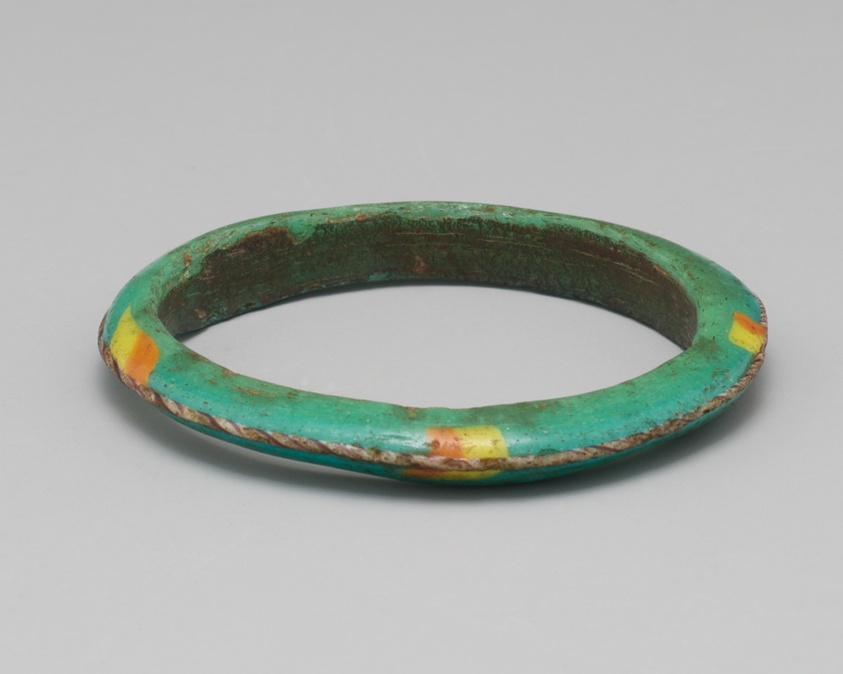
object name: Costume and Accessories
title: Bracelet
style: Islamic (culture or style)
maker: Islamic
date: 14th-15th century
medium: Glass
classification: glass; jewelry; ancient art; costume